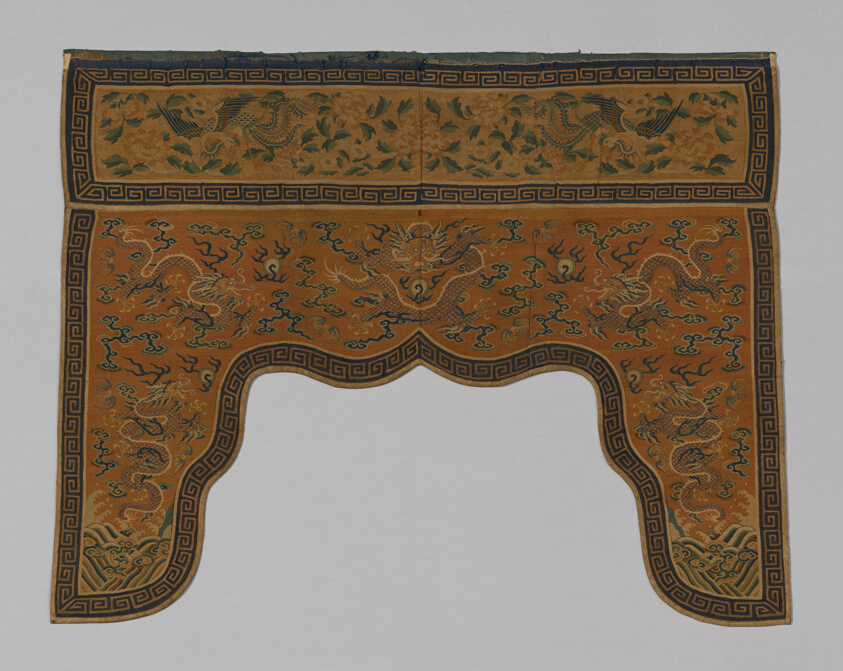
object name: Textile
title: Shrine Surround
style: qing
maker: China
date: Qing dynasty (1644–1911), 1750/1800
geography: China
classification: textile; weaving